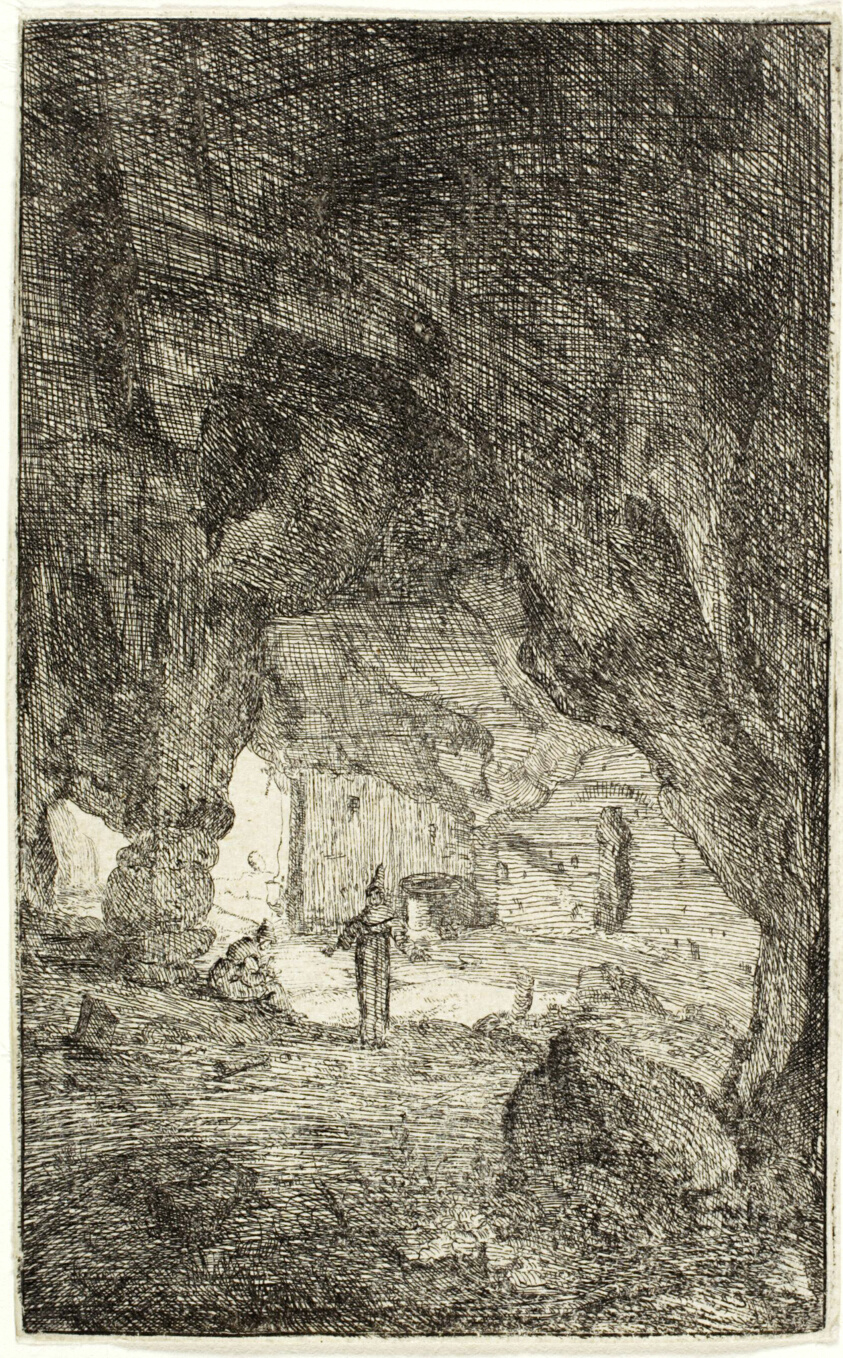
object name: Print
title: Grotto and Friars, from The Ruins of Rome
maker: Bartholomeus Breenbergh (Dutch, 1598-1657)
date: 1639/1640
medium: Etching in black on ivory laid paper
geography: Holland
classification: etching; print; prints and drawing